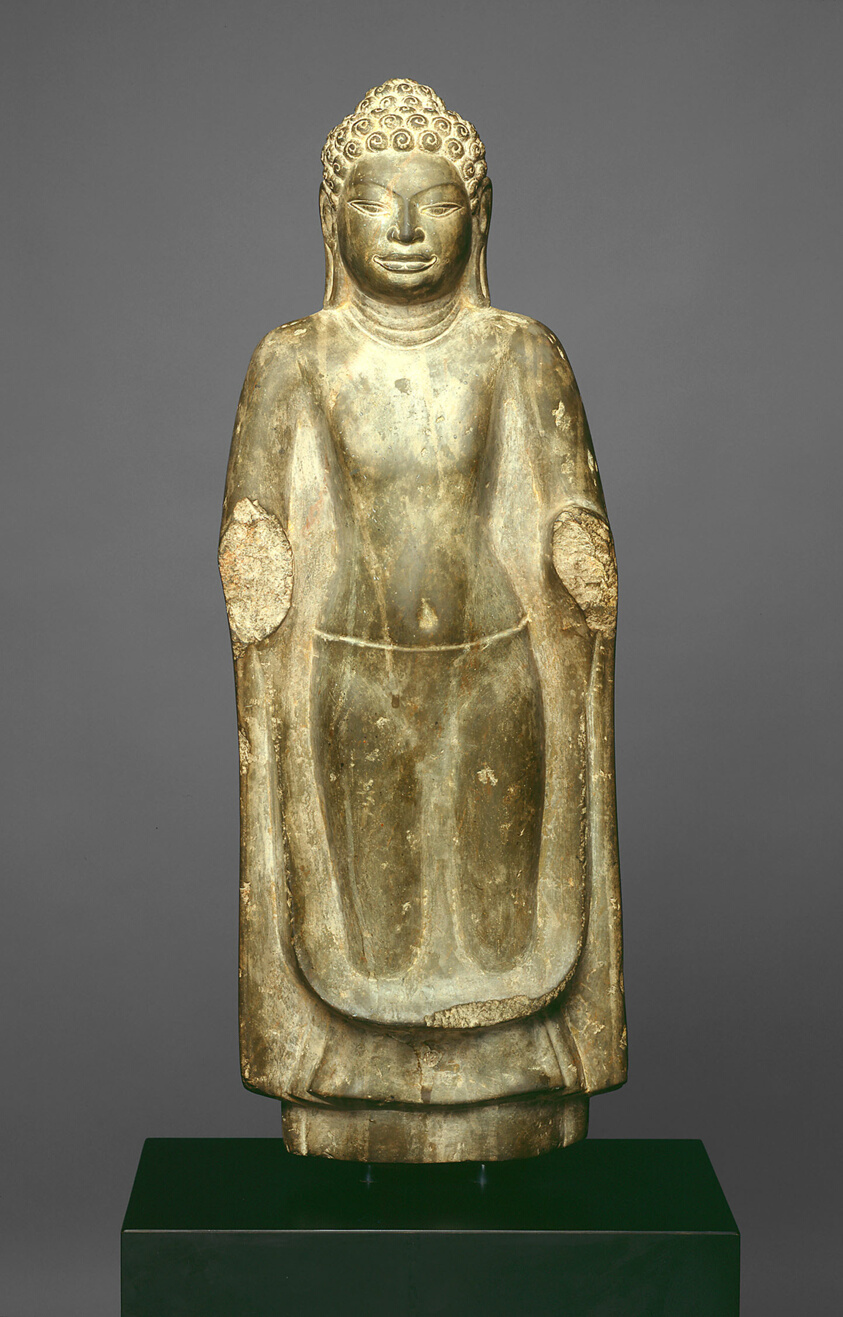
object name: Sculpture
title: Standing Buddha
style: Southeast Asian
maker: Central Thailand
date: Mon period, 8th‒9th century or later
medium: Limestone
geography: Thailand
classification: sandstone; stone; sculpture; asian art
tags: Buddha